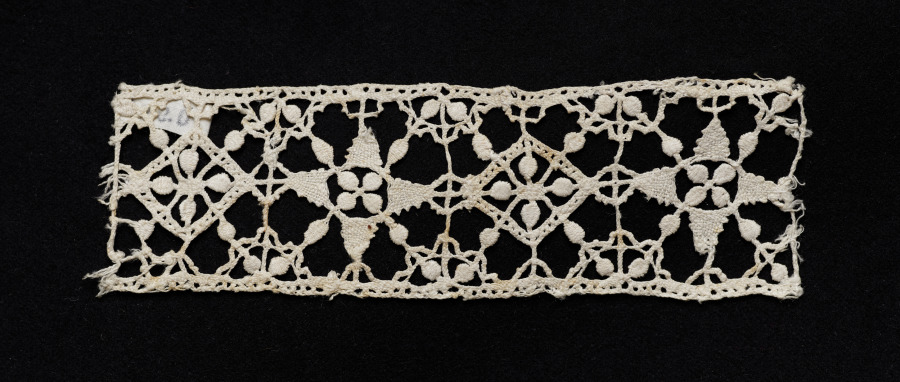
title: Lace Insertion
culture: Italy, Genoa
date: 1550–99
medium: Bobbin lace (needle lace, reticella design)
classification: Lace